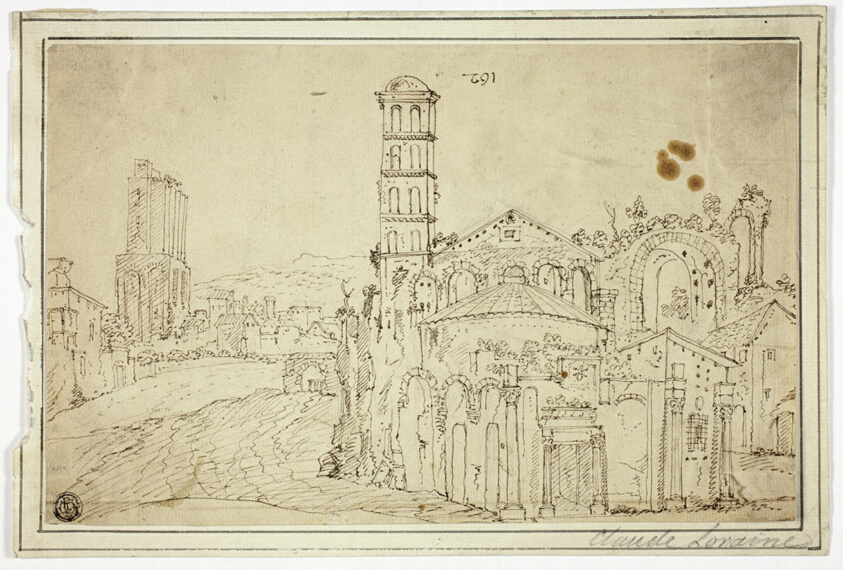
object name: Drawing and Watercolor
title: View in Rome: Torre della Melisa, Ruins of Early Christian Church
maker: Possibly Willem van Nieuwlandt, II; Flemish, 17th Century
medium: Pen and brown ink, over graphite, on ivory laid paper, tipped onto ivory laid paper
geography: Flanders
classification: pen and ink drawings; paper; drawings (visual works); prints and drawing